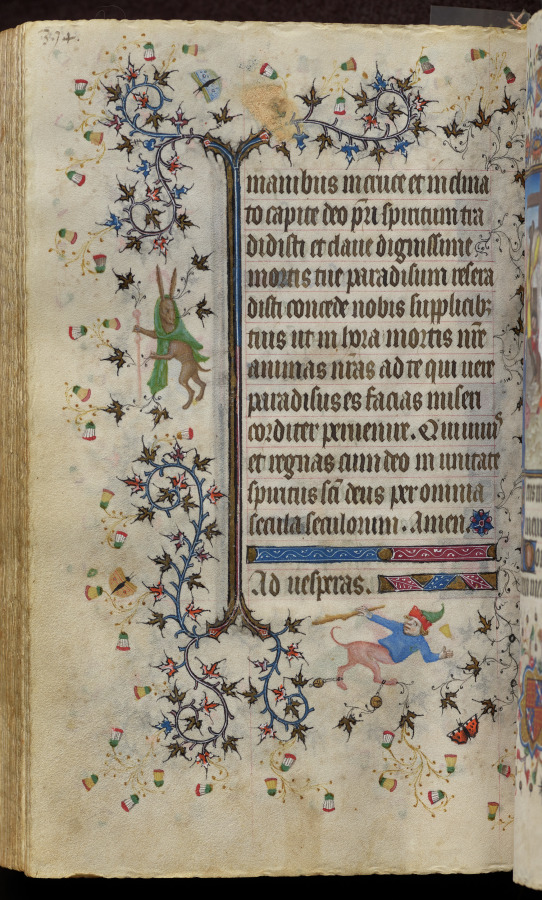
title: Hours of Charles the Noble, King of Navarre (1361-1425): fol. 191v, Text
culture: France, Paris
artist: Master of the Brussels Initials and Associates (French)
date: c. 1405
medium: ink, tempera, and gold on vellum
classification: Bound Volume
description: This precious volume was obviously highly prized by its owner, the French-born King of Navarre, who had his coat of arms painted on no less than twenty folios. Rather than directly commissioning this manuscript from a specific workshop, it seems that Charles the Noble acquired his book of hours -- perhaps ready-made for the luxury market -- while on a trip to Paris in 1404-05. A collaborative effort, six painting styles are evidenced within the pages of this codex, those of two Italians, two Frenchmen, and two Netherlanders. The painter who was responsible for the planning and decoration of the book, and who produced seventeen of the large miniatures, was a Bolognese artist known as the Master of the Brussels Initials. His principal assistant, responsible for most of the borders, was a Florentine who signed his name "Zecho" da Firenze on folio 208 verso.